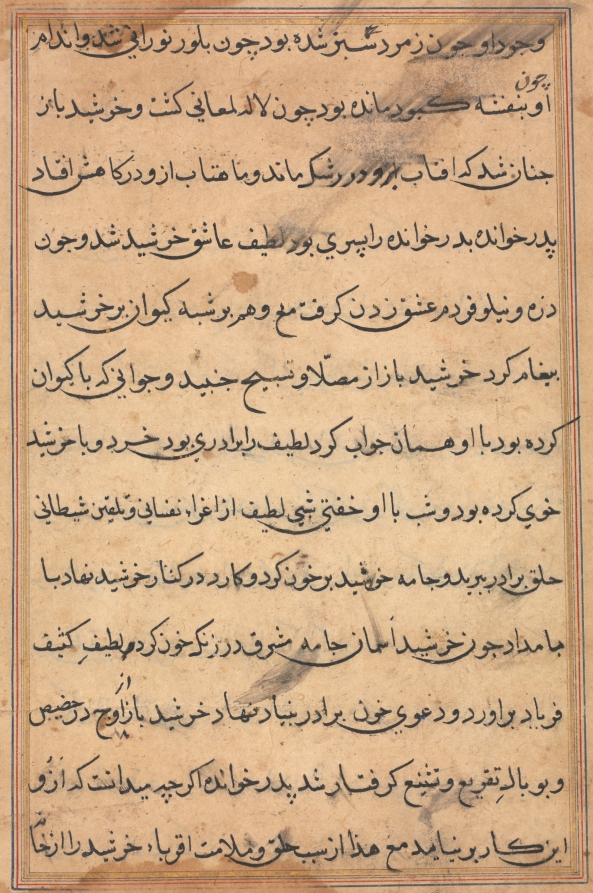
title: Page from Tales of a Parrot (Tuti-nama): text page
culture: Mughal India, court of Akbar (reigned 1556–1605)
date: c. 1560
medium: gum tempera, ink, and gold on paper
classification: Painting